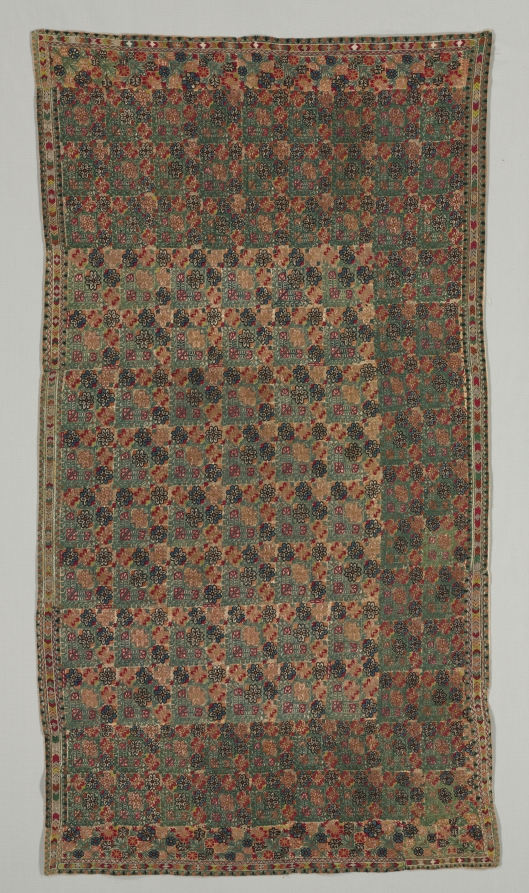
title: Embroidery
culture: Turkey ?, 19th century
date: 19th century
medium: embroidery: silk and metal strips on linen tabby ground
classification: Embroidery